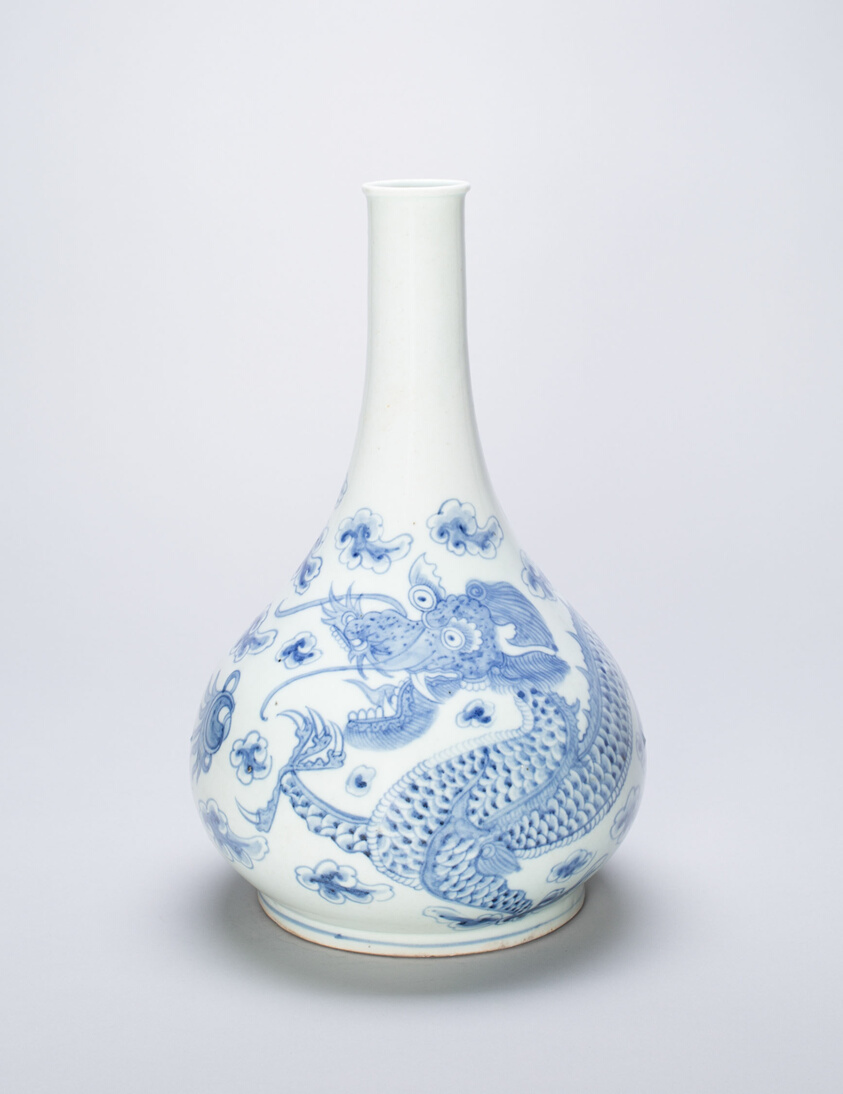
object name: Vessel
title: Vase with Dragon Motif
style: Korean (culture or style)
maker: Korea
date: Joseon dynasty (1392–1897), 19th century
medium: Porcelain with blue underglaze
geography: Korea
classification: vase; vessel; ceramics